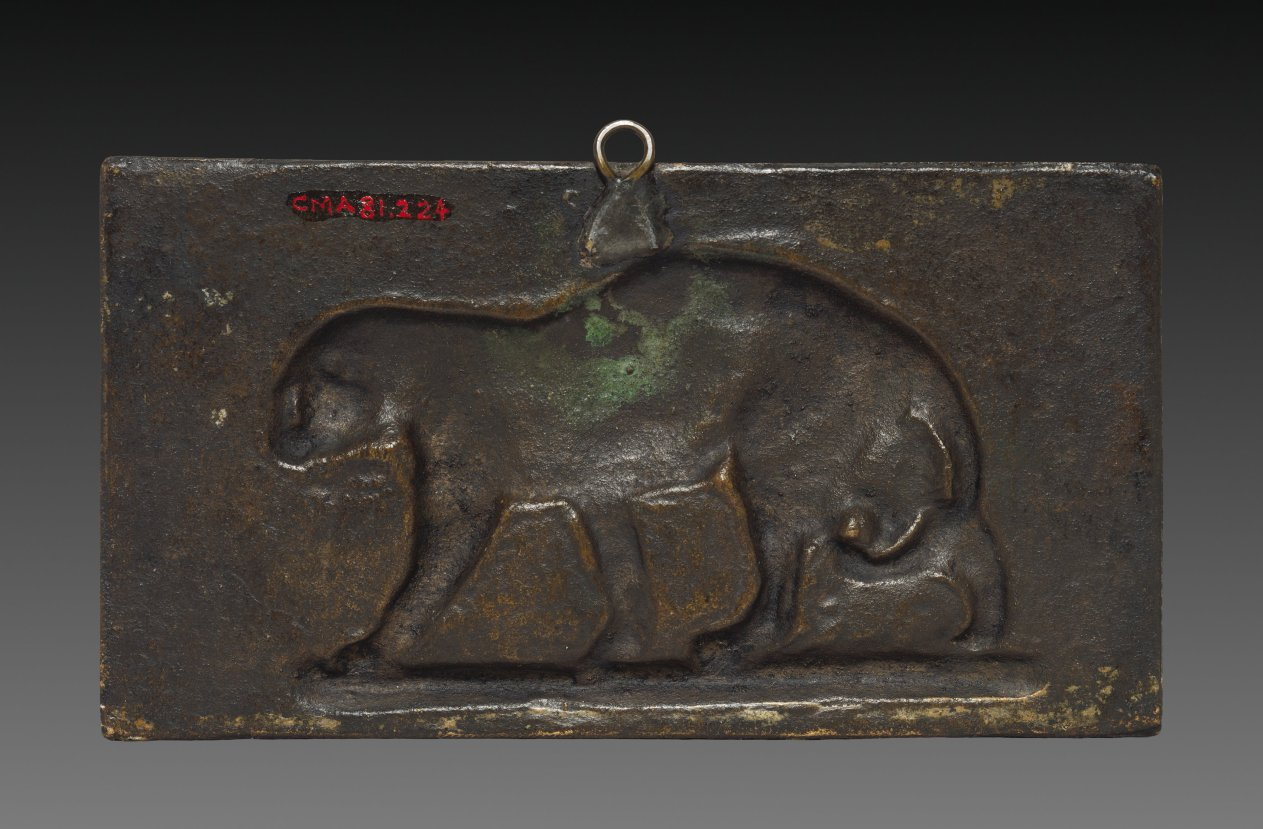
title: Walking Panther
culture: France, 19th century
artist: Antoine-Louis Barye (French, 1796–1875)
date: 1831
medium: bronze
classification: Sculpture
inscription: Inscribed right edge: "BARYE 1831"